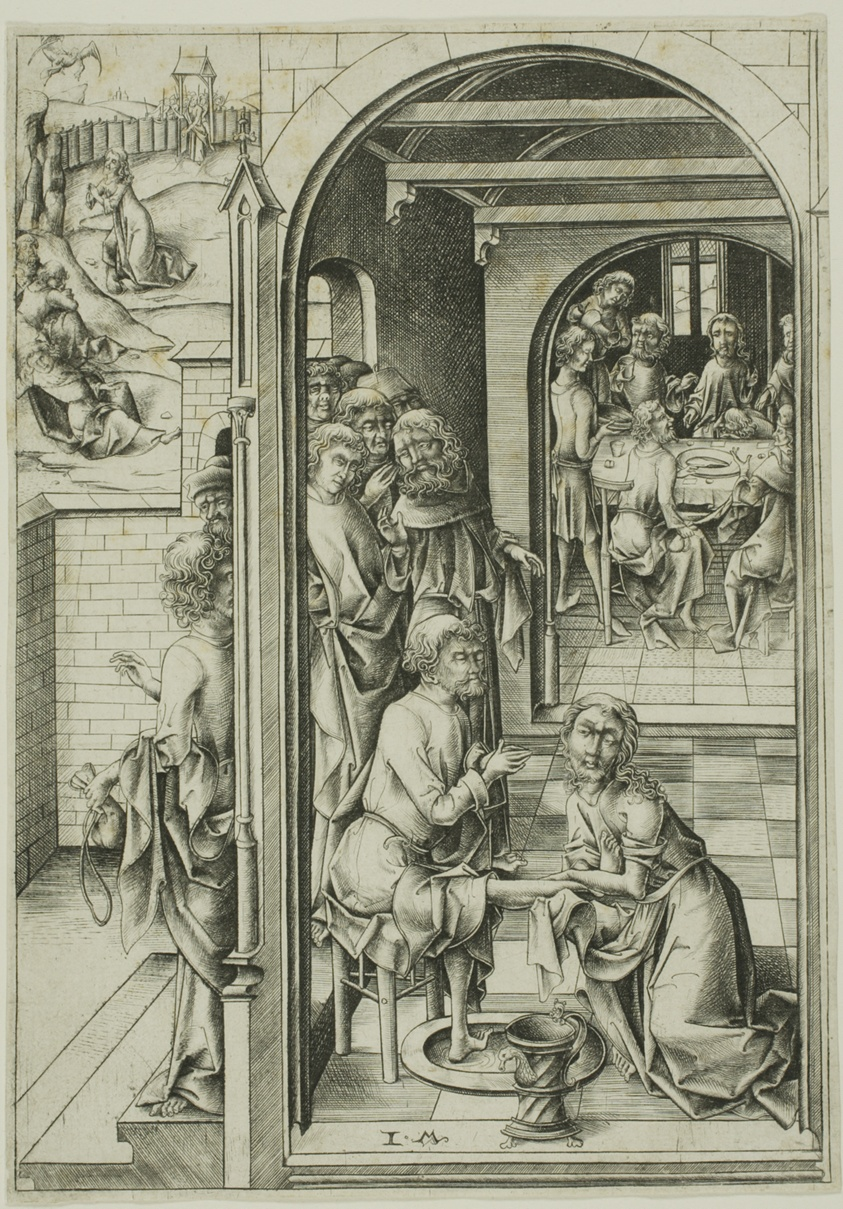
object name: Print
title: Christ Washing the Feet of the Apostles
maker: Israhel van Meckenem the Younger; German, c. 1440/45-1503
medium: Engraving on ivory laid paper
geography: Germany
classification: engraving; print; prints and drawing